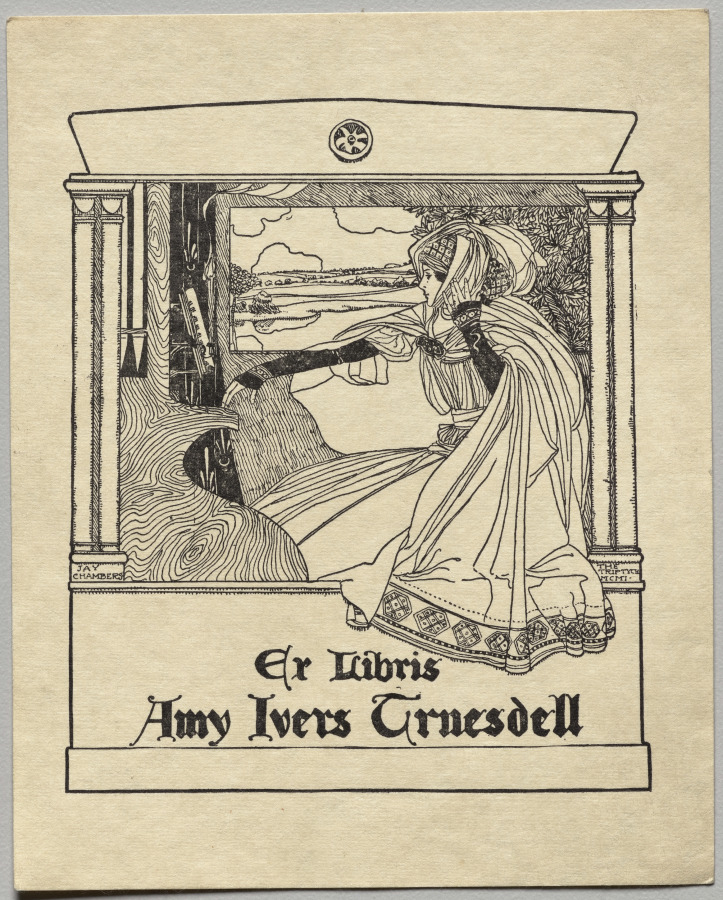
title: Bookplate: Amy Ivers Truesdell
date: 1901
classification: Print